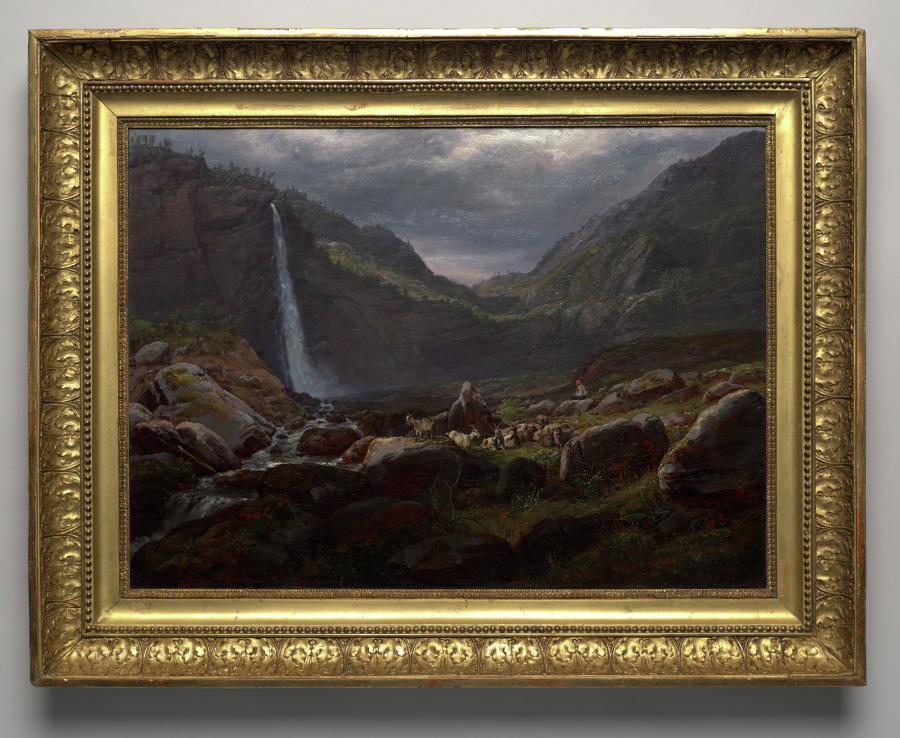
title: Feige Waterfall (Feigefossen), Lysterfjord, Norway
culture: Norway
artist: Johan Christian Clausen Dahl (Norwegian, 1788–1857)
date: 1848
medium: Oil on canvas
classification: Painting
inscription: Signed and dated lower right: "Dahl / 1848"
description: Johan Christian Dahl painted this dramatic view of the Feige Waterfall at Lysterfjord, one of the most spectacular natural wonders in his homeland, at time a when Norwegians were trying to foster awareness of their identity as a distinct national culture. Dahl’s views of Norway played a crucial role in establishing his reputation as the leading Norwegian artist of the period and one of most important landscape painters of the Romantic era.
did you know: Set against a magnificent mountain cliff, the waterfall empties into a broad fjord that stretches nearly 70 miles before reaching the ocean just north of Dahl’s hometown of Bergen.